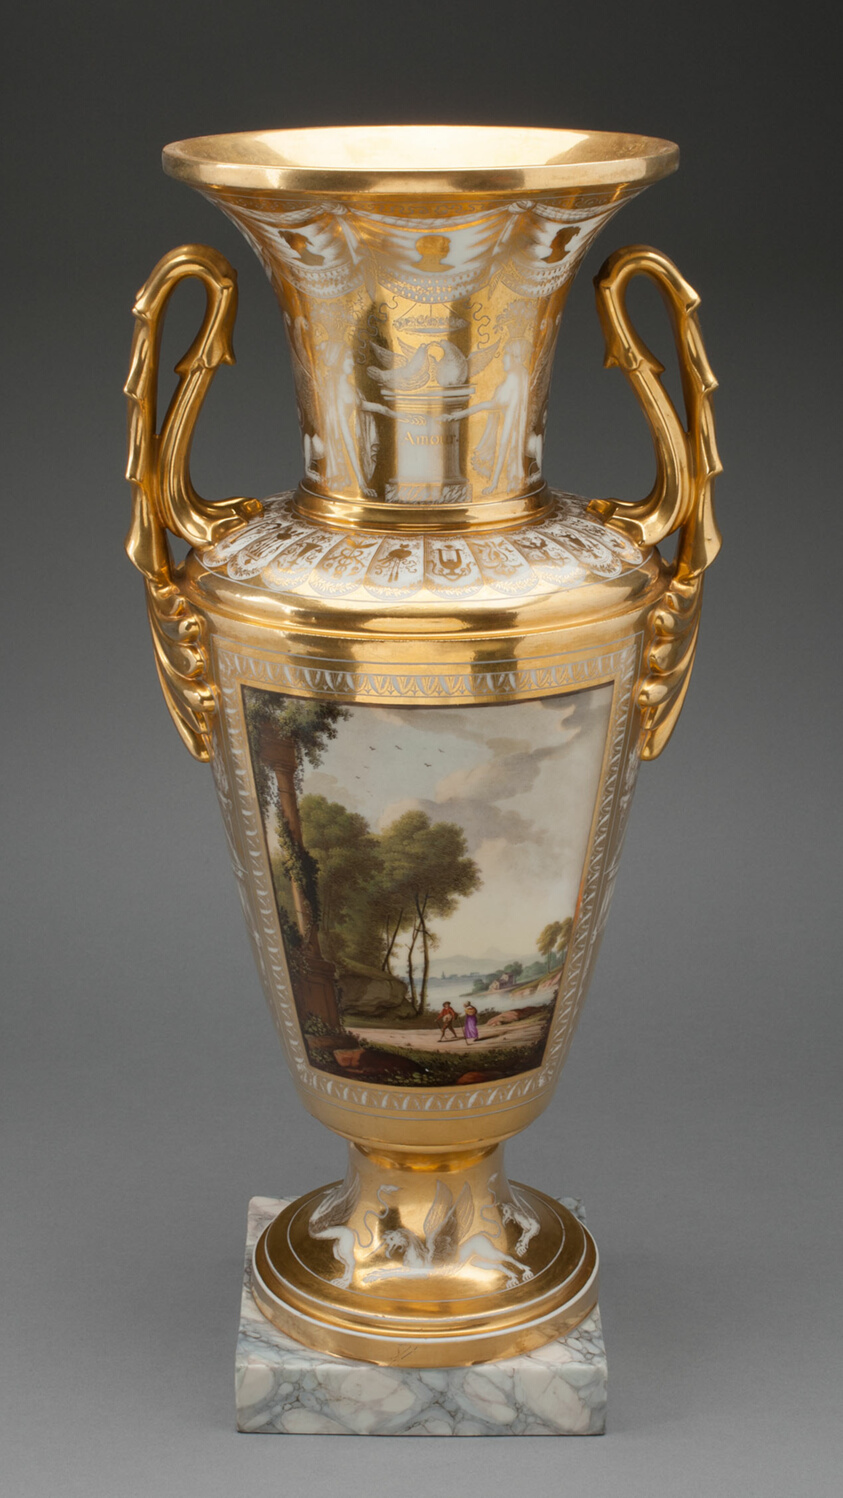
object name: Ceramics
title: Vase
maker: Neppel Porcelain Factory (French, 1800-1818)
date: c. 1810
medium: Hard-paste porcelain with polychrome enamels and gilding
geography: Paris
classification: vase; vessel; porcelain; ceramics; european decorative arts